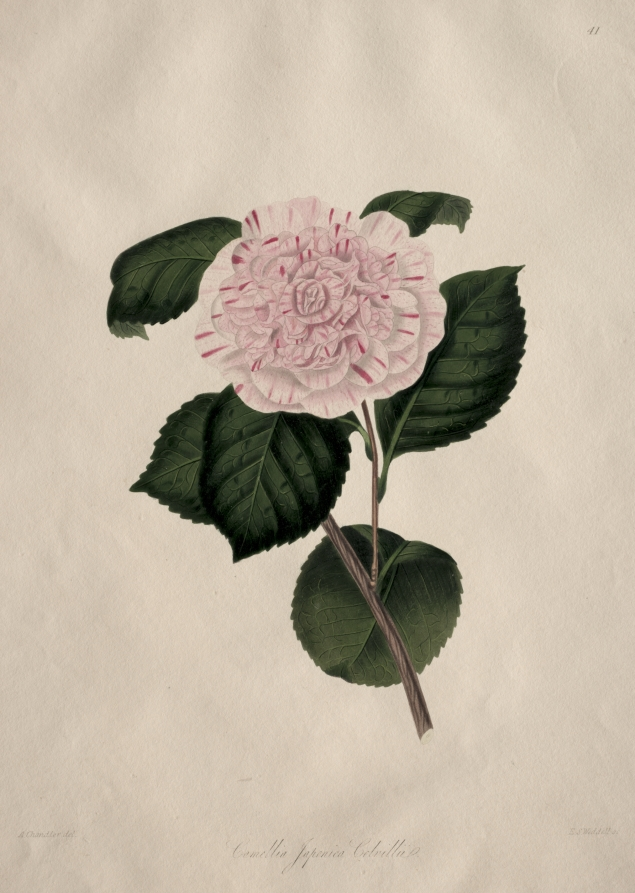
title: Illustrations and descriptions of...the Natural Order Camellieae: No. 41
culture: England, 18th century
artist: Alfred Chandler (British)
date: c. 1820–96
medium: engraving, hand-colored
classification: Print